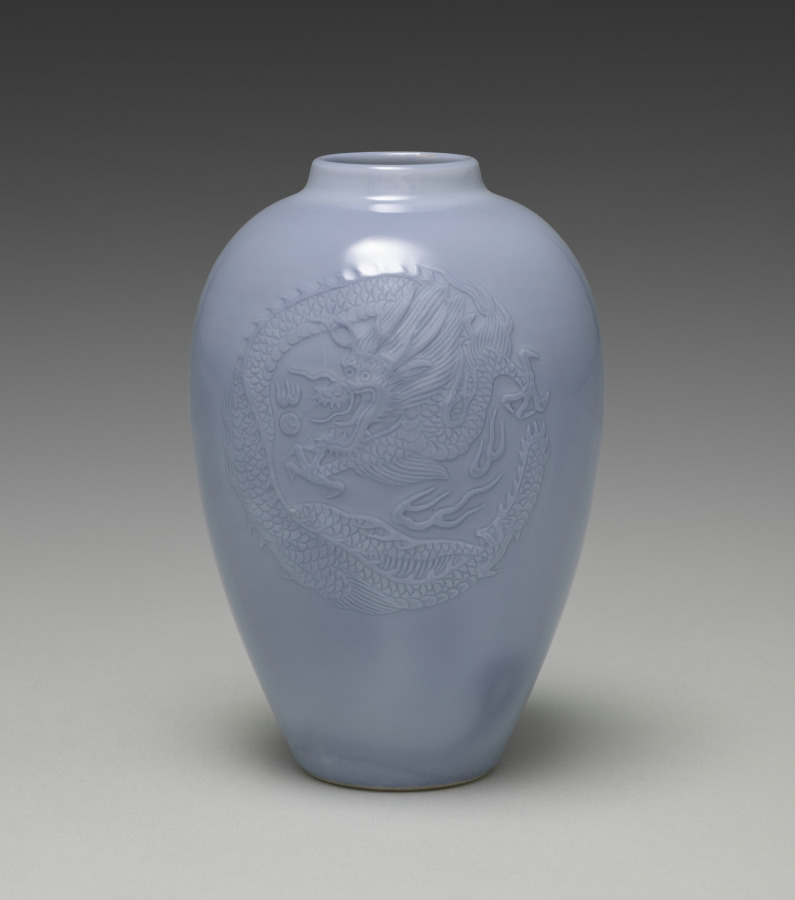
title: Vase with Dragon Roundels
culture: Japan, Meiji period (1868–1912)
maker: Seifū Yohei III (Japanese, 1851–1914)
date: 1900–1914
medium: Porcelain with purple glaze and molded and carved design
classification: Ceramic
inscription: 清風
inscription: 成山清風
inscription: The top of the box lid describes the vase.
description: Each side of this lavender-colored vase is nearly covered with a low-relief design of a four-clawed dragon curled around a flaming jewel. The box lid carries an attestation by Yohei IV that the vase was produced by his predecessor, and the signature on the base is one Yohei III used later in his career. The lid also makes reference to Jun (J. Kin) ware, which was made in numerous kilns in what is now Yuzhou or Yuxian in Henan Province, China, during the Northern Song dynasty. Some Jun wares had an opalescent purple glaze, which was clearly the inspiration for the color seen on this vase.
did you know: Kyoto-based Japanese ceramist Seifū Yohei III (1851–1914) admired the glaze colors found on Chinese porcelain and tried to replicate them through intensive experimentation.